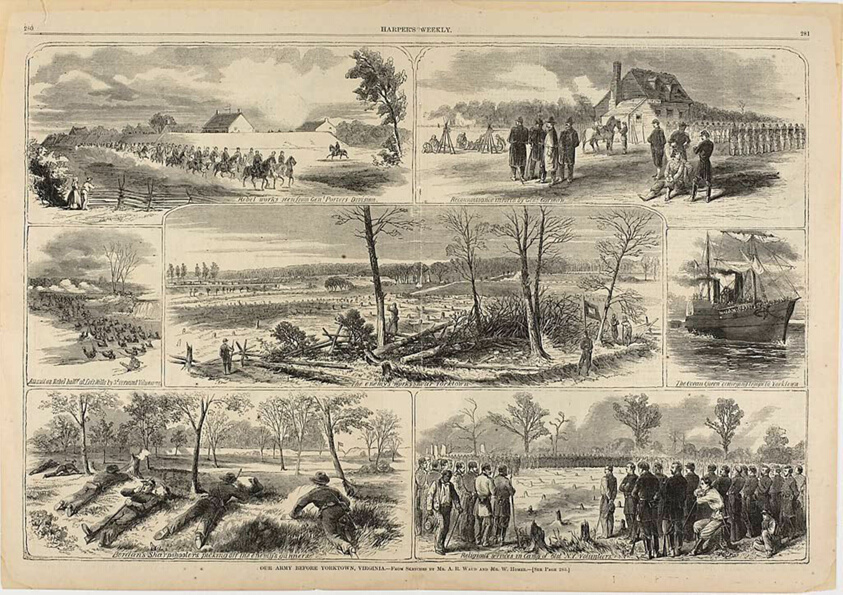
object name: Print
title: Our Army Before Yorktown, Virginia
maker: Winslow Homer (American, 1836-1910); published by Harper's Weekly (American, 1857-1916)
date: published May 3, 1862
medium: Wood engraving on paper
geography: United States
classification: wood engraving; print; prints and drawing